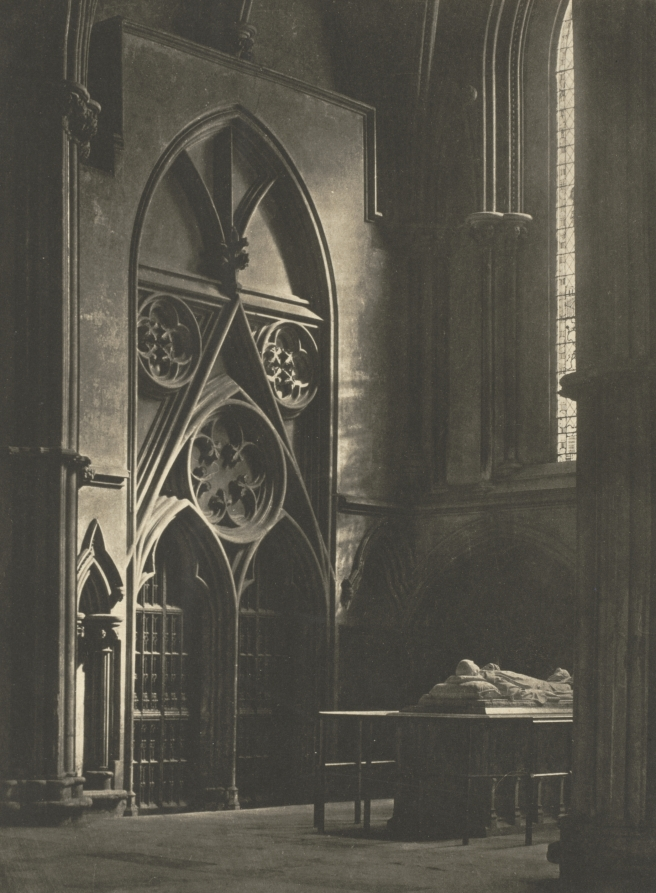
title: Camera Work: In Sure and Certain Hope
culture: England, 20th century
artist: Frederick H. Evans (British, 1853–1943)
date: 1904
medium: photogravure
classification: Bound Volume